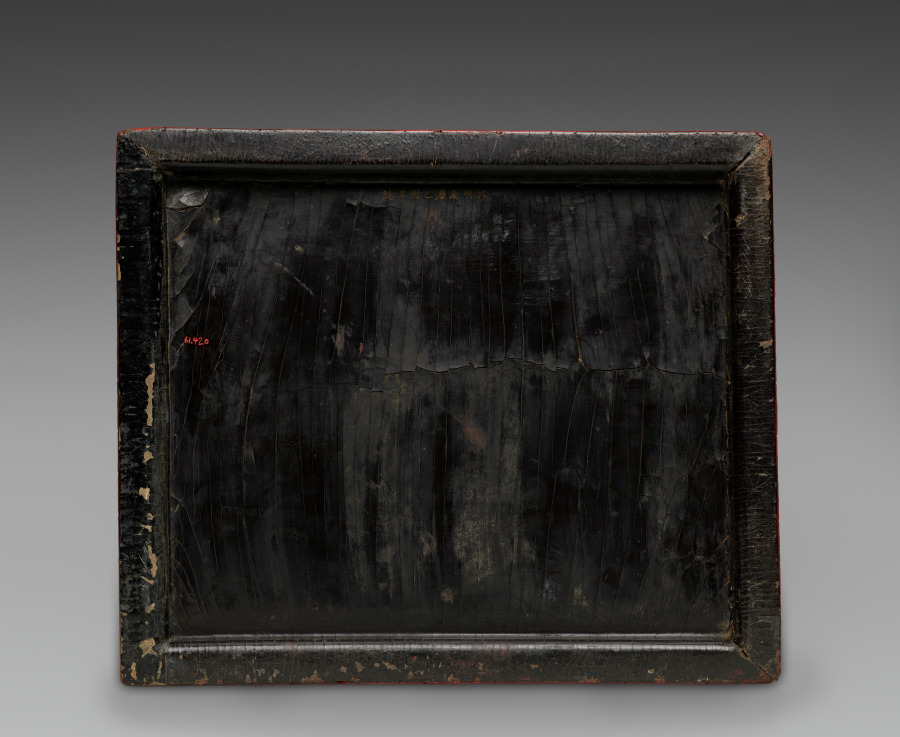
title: Tihong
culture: China, Ming dynasty (1368-1644), Wanli reign (1572-1620)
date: 1585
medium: carved cinnabar lacquer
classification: Lacquer